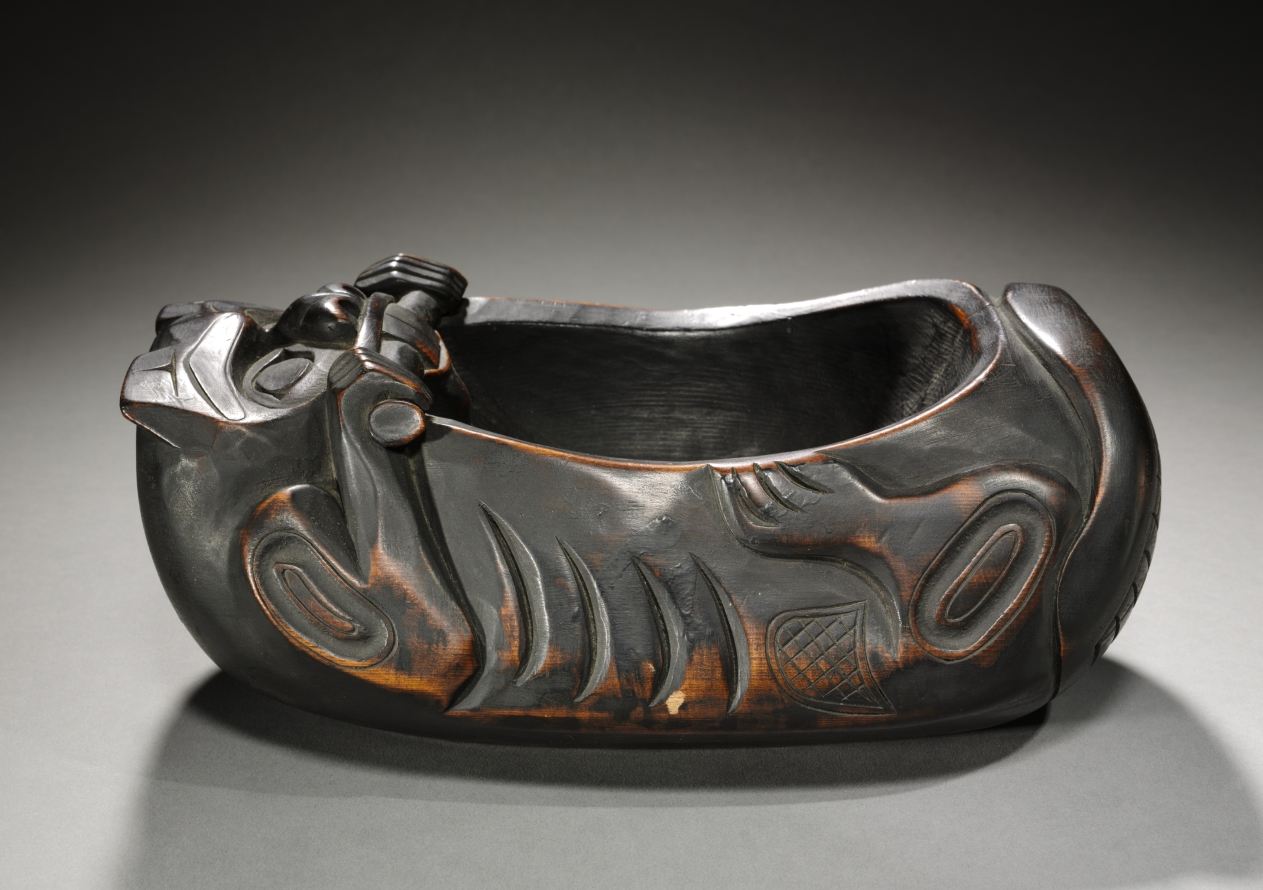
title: Beaver-Shaped Bowl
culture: Native North America, Northwest Coast, Alaska, Tlingit?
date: c. 1890–1920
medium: wood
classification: Wood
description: Bowls were a major Northwest Coast art form, used in many contexts including potlatch feasts that validated the rights and privileges of wealthy noble families. When Euro-American settlement forced a change from traditional to cash economies in the early 1900s, Indigenous carvers turned their skills to creating bowls like this example for the outside market.